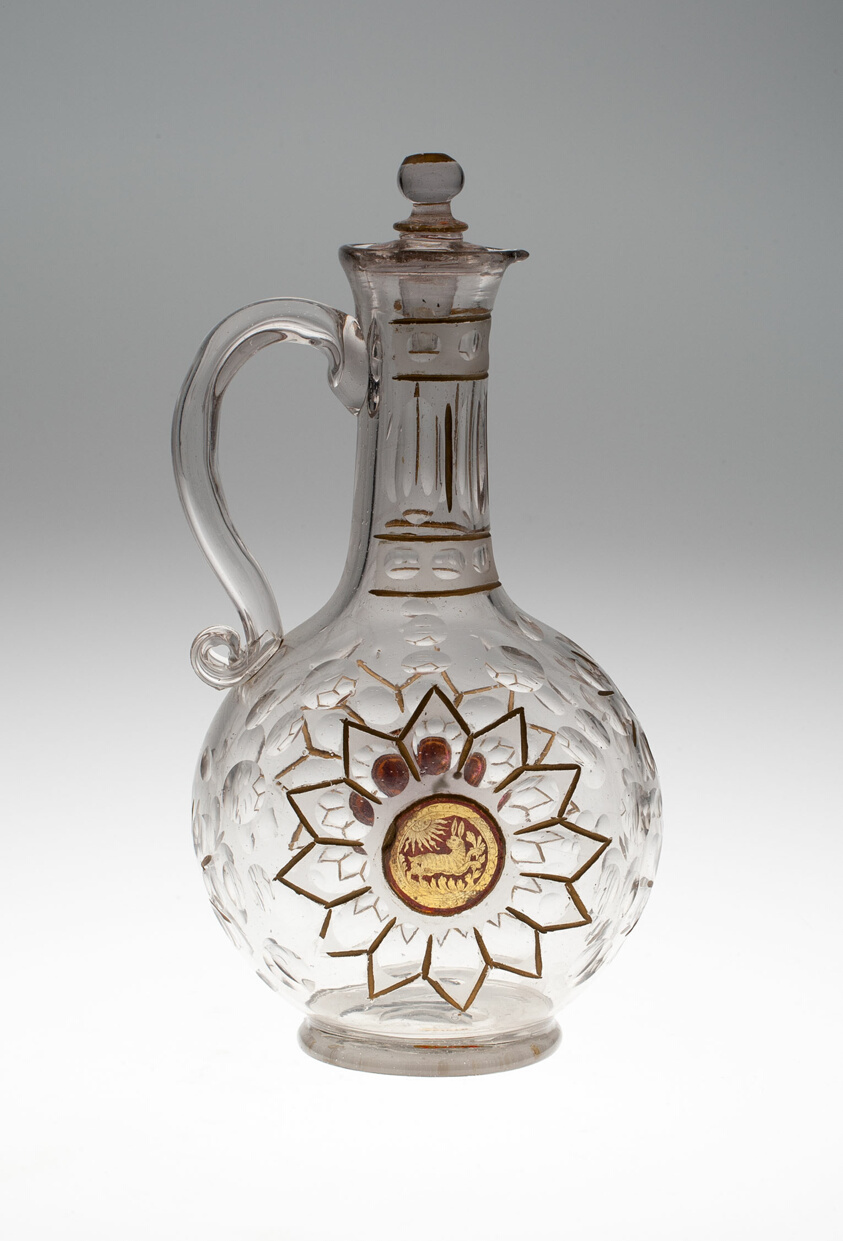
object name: Glass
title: Bottle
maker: Bohemia, Czech Republic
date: c. 1730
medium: Glass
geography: Bohemia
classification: glass; european decorative arts